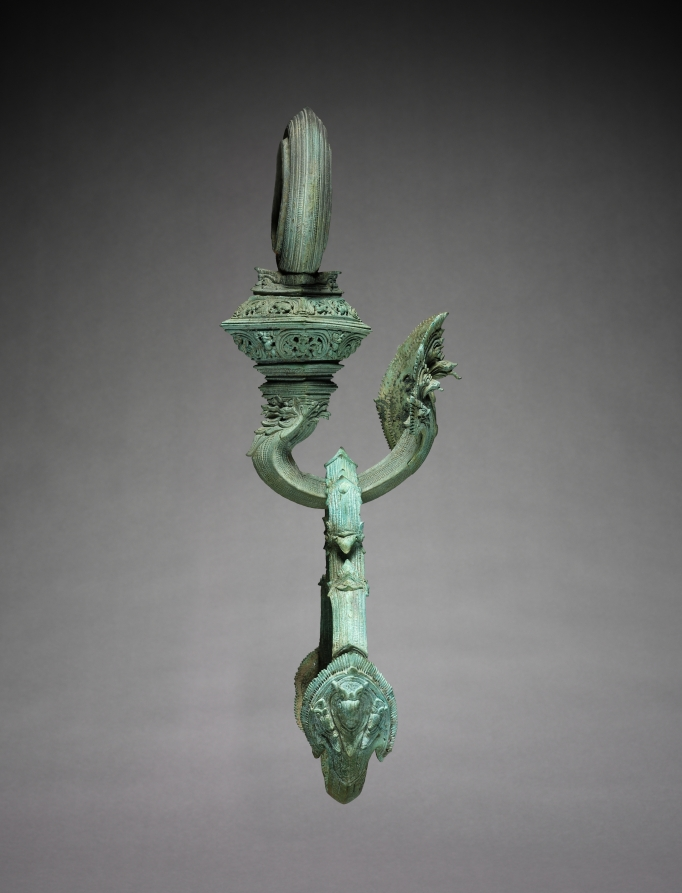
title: One of a Pair of Decorated Palanquin Hooks and Rings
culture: Cambodia, Angkor Wat Style, 12th century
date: 1100–1175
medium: bronze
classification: Sculpture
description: Hooks, suspension rings, and finials cast in bronze are very common fixtures in Cambodian decorative art. Frequently they served a practical function, such as the present set, used for a palanquin in which a person was carried from place to place. The litter or throne was fastened to the rings which in turn were suspended from the books fixed by bolts to transverse poles carried on the shoulders of the palanquin bearers. Chariots, palanquins, furniture, and harnesses were frequently embellished with various bronze decorations, finials, and fixtures. Those, as a rule, were gilded, making the objects they served look very sumptuous. The relief sculpture found on various Khmer monuments, such as Angkor Wat or Bayon, illustrates well the use and context of those bronze implements in ancient Cambodian life. These frequently elaborate bronze fixtures were decorated with motifs generally popular in Cambodian art: such as nagas, garudas, floral, or animal patterns. This pair of hooks and rings, unusually large in size, take on a naga form in the hooks. They are decorated with perforated floral and animal motifs done with great care and precision. The rings, suspended from hooks, are in the form of tri-fold flower stalks with naga motifs repeated at the end of the curved stalks. Such elaborate and huge hooks and rings must have no doubt decorated a palanquin of an important individual, possible a ruler himself. Their decoration is typical of the mature Angkor Wat style.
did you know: The naga, a water serpent with a multiheaded hood, is a Khmer national emblem.